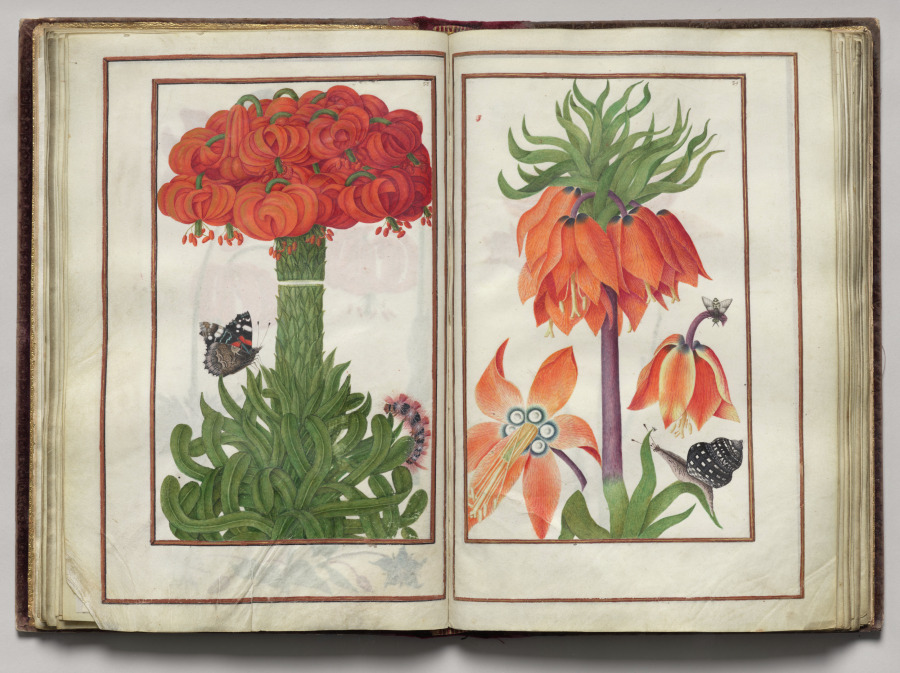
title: Florilegium (A Book of Flower Studies)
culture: France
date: 1608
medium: bound manuscript of 48 leaves, 77 drawings; watercolor, ink, silver, and gold over occasional traces of pencil, on vellum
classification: Bound Volume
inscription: Dated: Poitiers 1608 (on frontispiece) Signed: On frontispiece in black ink, lower right: Van Kuyk Notation on drawing: Frontispiece: in pencil, lower margin: * élève de Van Kessel, peintre flammand (* in pencil also appears in front of Van Kuyk's name).